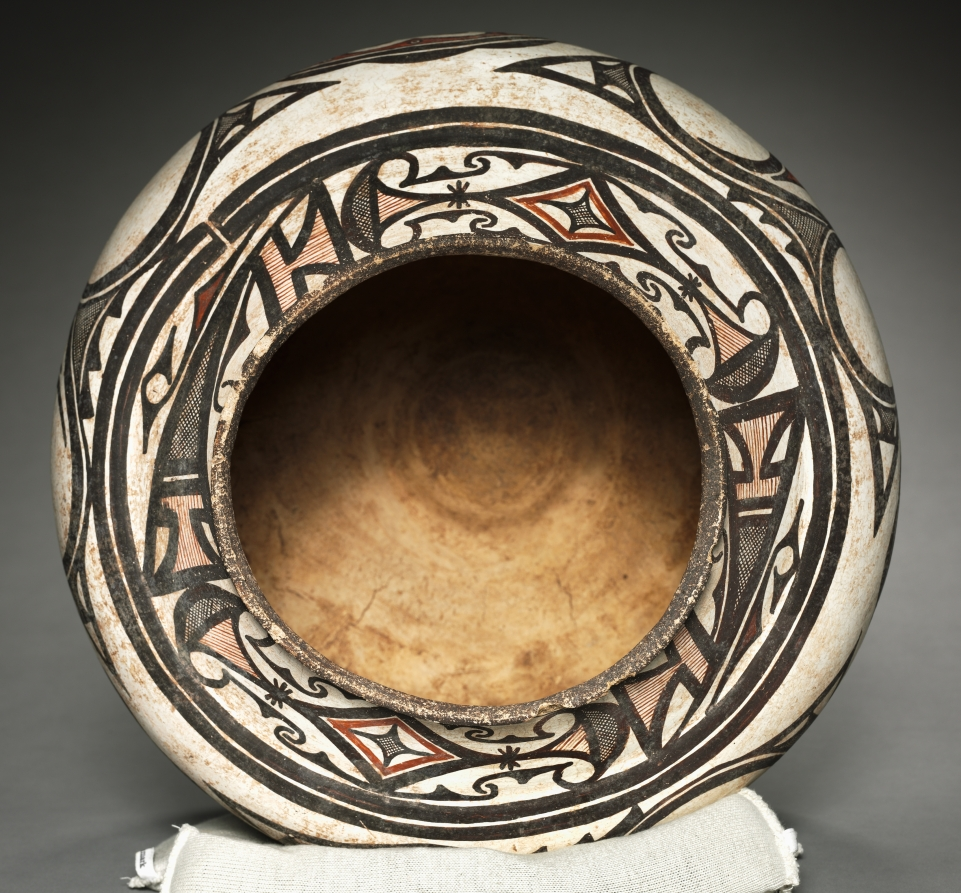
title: Water Jar (Olla) with Rosettes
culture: Native North America, Southwest, New Mexico, Zuni (A:shiwi) Pueblo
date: 1880s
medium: ceramic, slip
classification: Ceramic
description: In the past, motifs painted on Zuni (A:shiwi) ceramics likely held symbolic meanings but, if so, they are largely lost to memory—or at least the Zuni do not discuss them today. Where known, they seem to concern water, verdant crops, and abundant wildlife, also the focus of much Pueblo religious life. For instance, the large, triangular, blade-like forms around this vessel’s neck may represent the thunder knife used in many ceremonies. The petaled forms in circular rosettes refer to sunflowers.